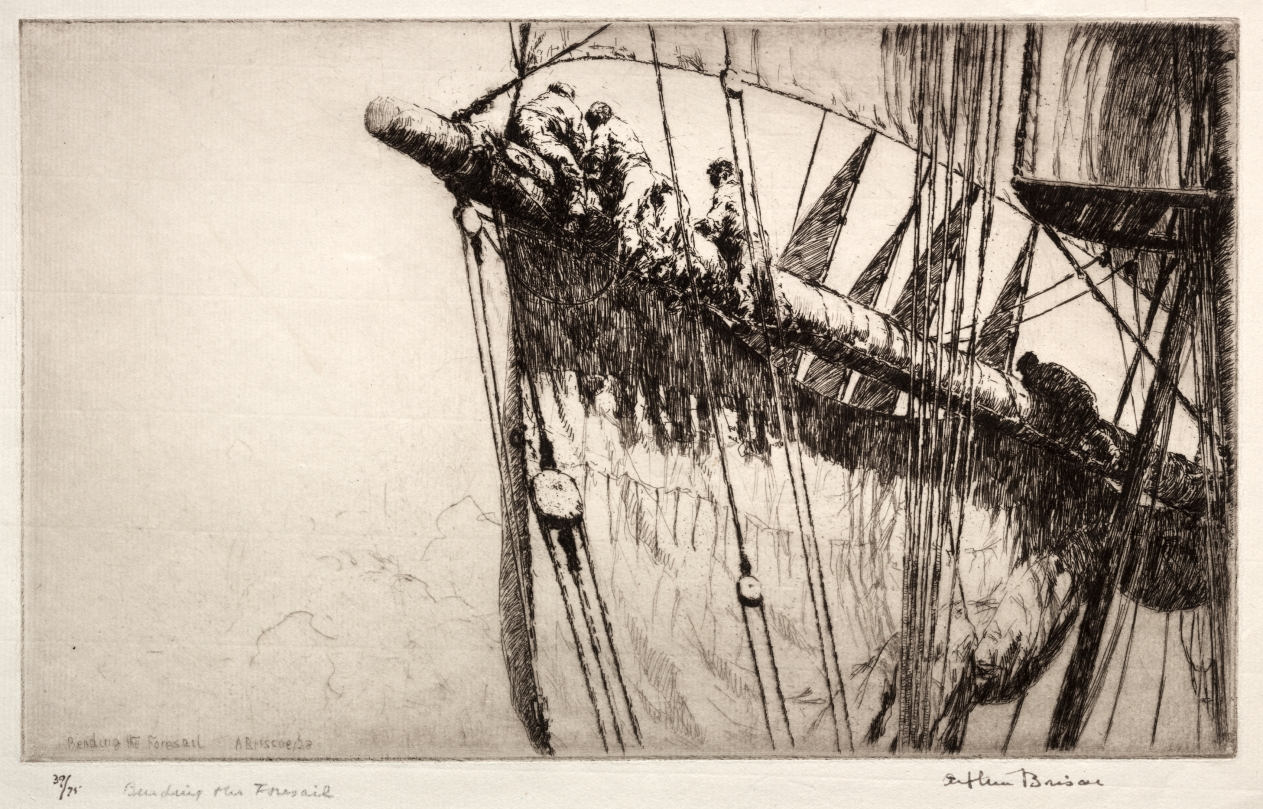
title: Bending the Foresail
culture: England, 20th century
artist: Arthur John Trevor Briscoe (British, 1873–1943)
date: 1928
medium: etching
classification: Print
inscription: Lower margin, in brown ink: 39/75 Arthur Briscoe In graphite: Bending the Foresail